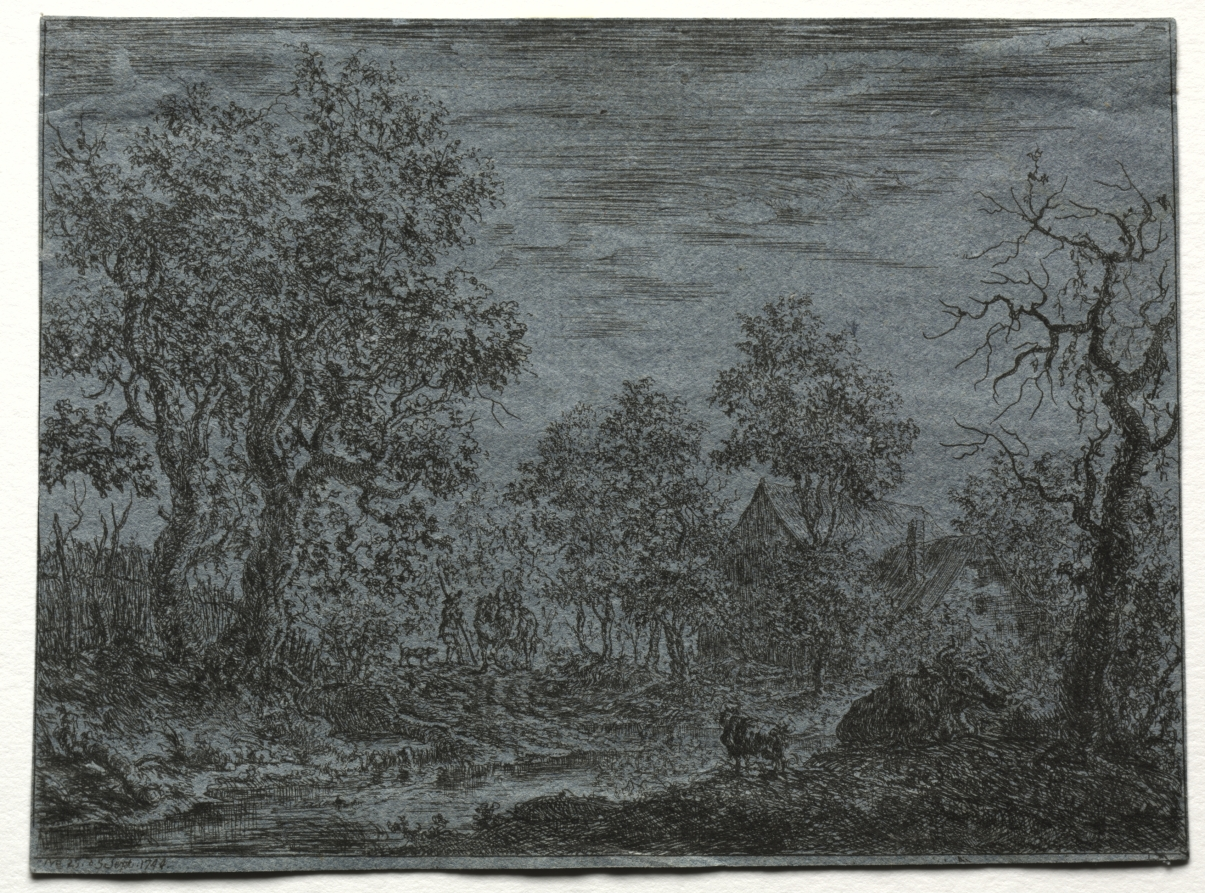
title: A Small River in the Foreground with a Cow and Goat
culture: Germany, 18th century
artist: Christian Ludwig von Hagedorn (German, 1712–1780)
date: 1744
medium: etching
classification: Print